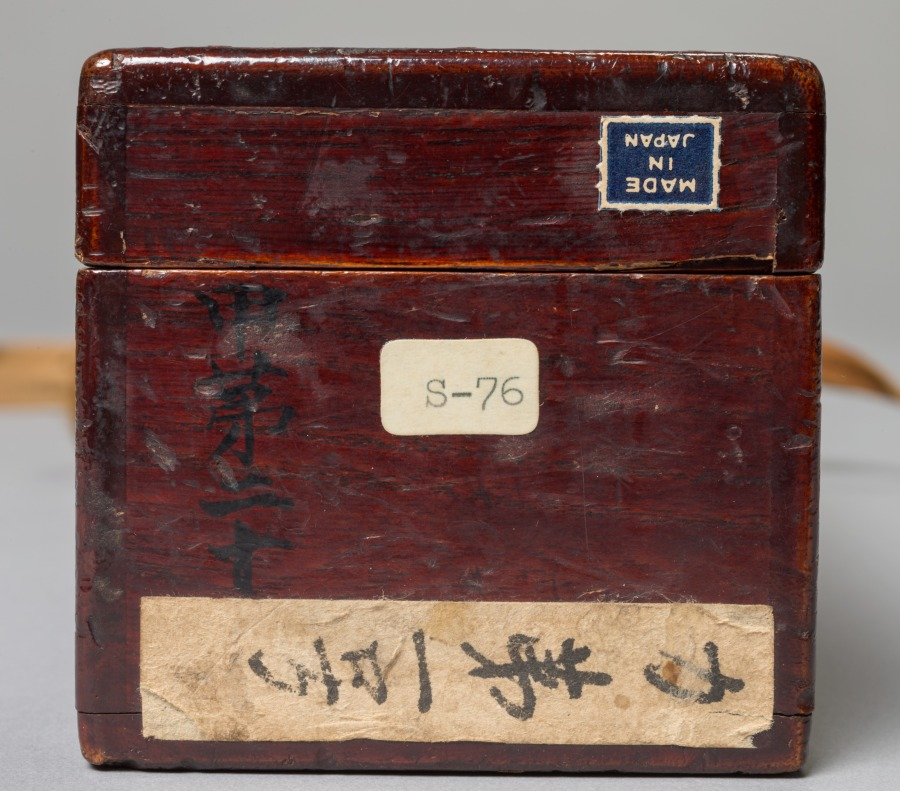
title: Seated Priest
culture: Japan, Momoyama period (1573-1615) to Edo period (1615-1858)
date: late 1500s-1650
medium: hanging scroll; ink on paper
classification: Painting